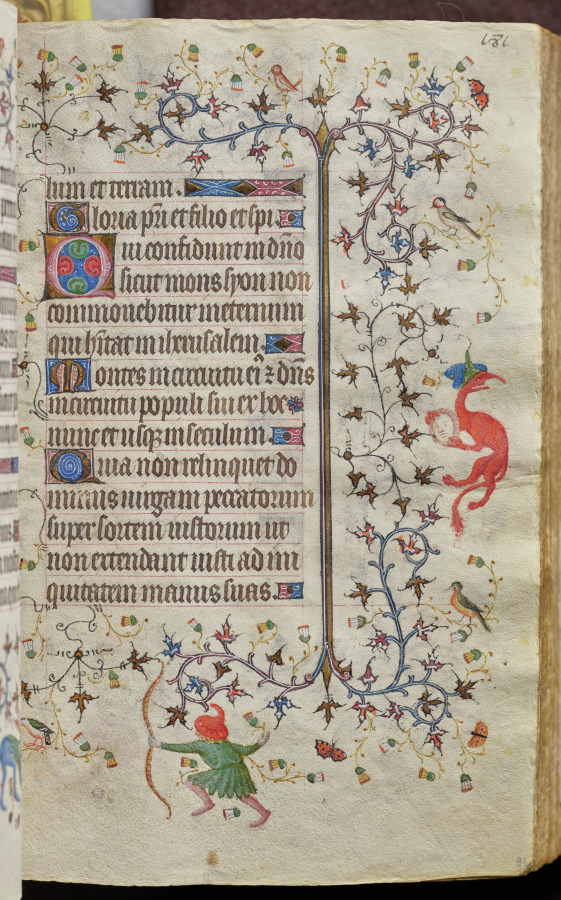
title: Hours of Charles the Noble, King of Navarre (1361-1425): fol. 91r, Text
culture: France, Paris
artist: Master of the Brussels Initials and Associates (French)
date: c. 1405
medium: ink, tempera, and gold on vellum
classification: Bound Volume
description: This precious volume was obviously highly prized by its owner, the French-born King of Navarre, who had his coat of arms painted on no less than twenty folios. Rather than directly commissioning this manuscript from a specific workshop, it seems that Charles the Noble acquired his book of hours -- perhaps ready-made for the luxury market -- while on a trip to Paris in 1404-05. A collaborative effort, six painting styles are evidenced within the pages of this codex, those of two Italians, two Frenchmen, and two Netherlanders. The painter who was responsible for the planning and decoration of the book, and who produced seventeen of the large miniatures, was a Bolognese artist known as the Master of the Brussels Initials. His principal assistant, responsible for most of the borders, was a Florentine who signed his name "Zecho" da Firenze on folio 208 verso.